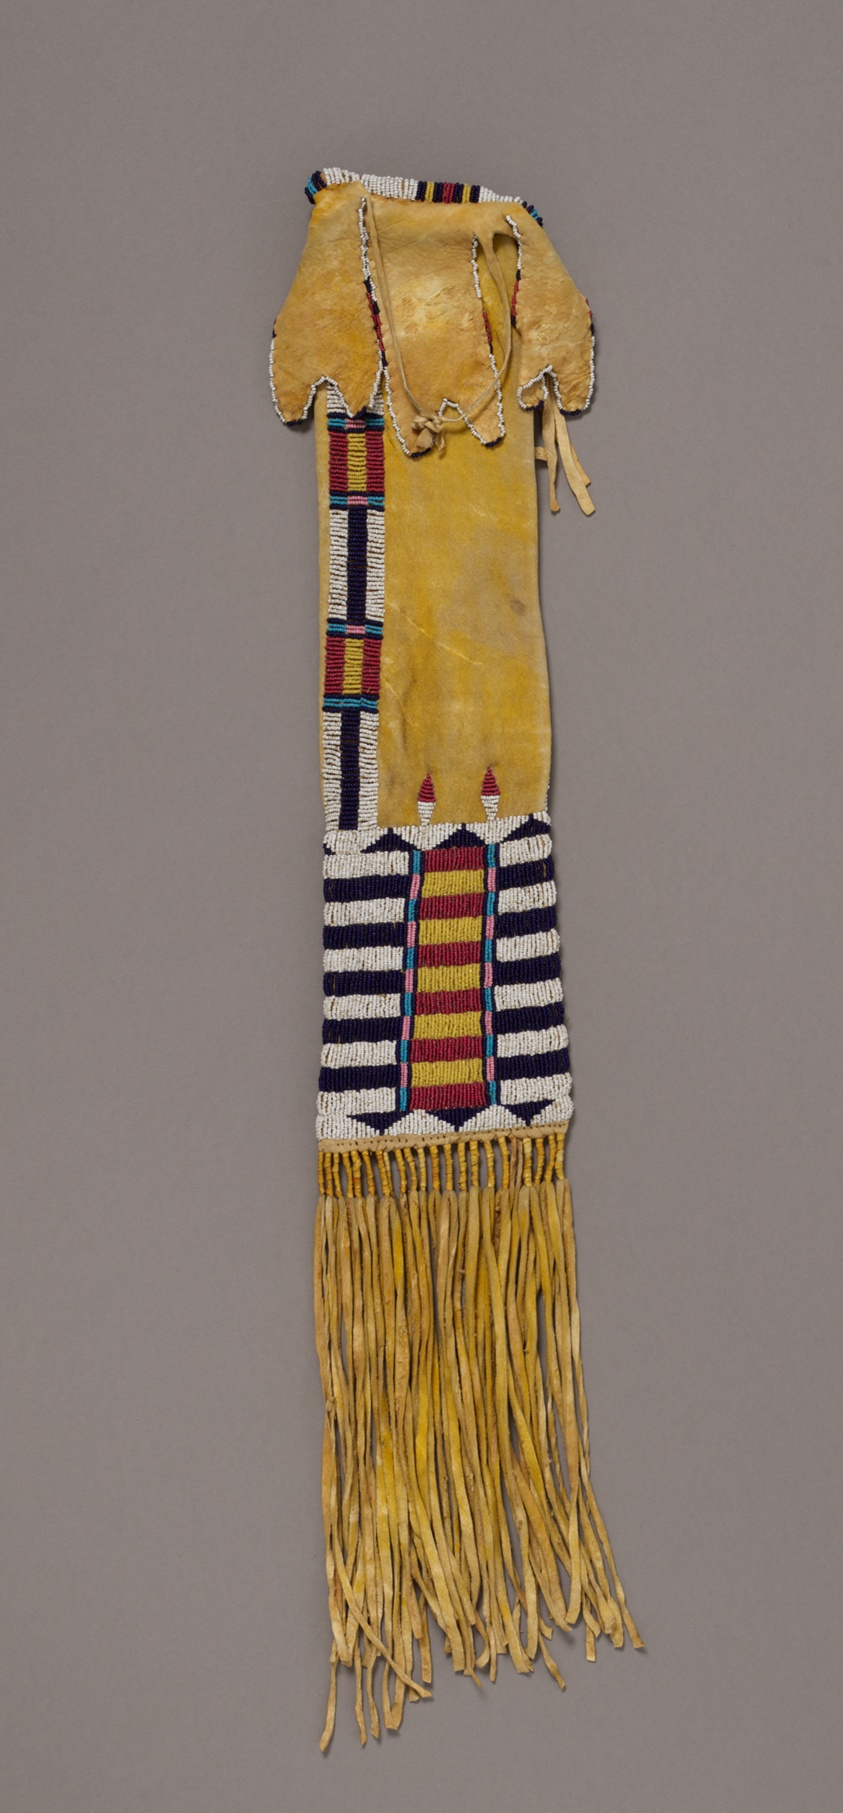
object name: Religious/Ritual Object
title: Pipe Bag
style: cheyenne, plains indian, native american, americas, Arts of the Americas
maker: Artist unknown (Cheyenne, Tsistsistas); Great Plains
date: c. 1865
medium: Leather, glass beads, and sinew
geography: Great Plains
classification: beadwork; costume accessory; art of the americas; ritual objects